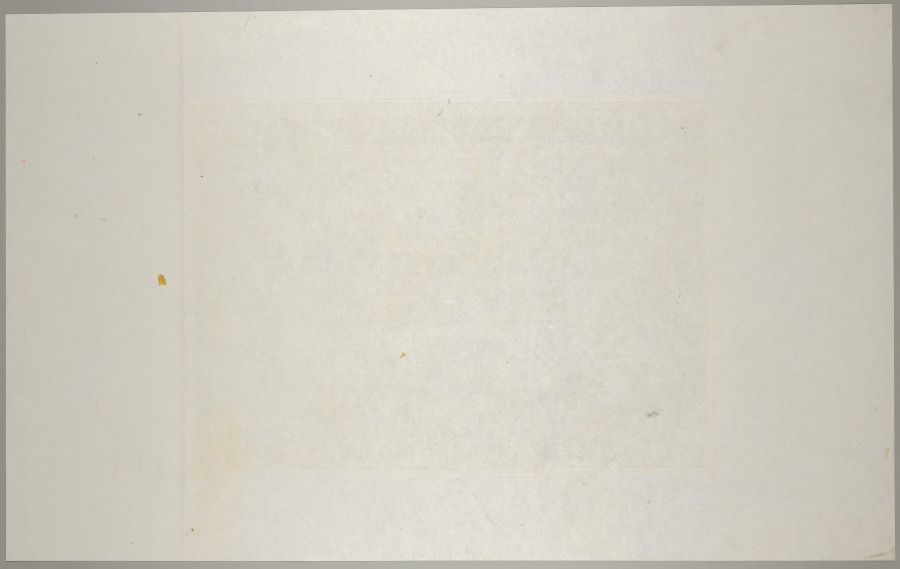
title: A Newly Cut Print: Scenes from the First Part of Outlaws of the Marsh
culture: China, Qing dynasty (1644–1911), Jiaqing period (1796–1820)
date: 1796–1820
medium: Polychrome woodblock print; ink and color on paper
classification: Print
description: In the 1600s, printing flourished in such Jiangnan cities as Nanjing, Suzhou, Hangzhou, and Huizhou, evolving from privately enjoyed illustrated books printed in color to more commercialized single-sheet color prints that were hung on walls and became part of the rich urban visual culture.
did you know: Woodblock printing in color reached a height in China in the 1600s to 1700s. The prints were executed by means of sets of separate blocks, each carved to print a different color.